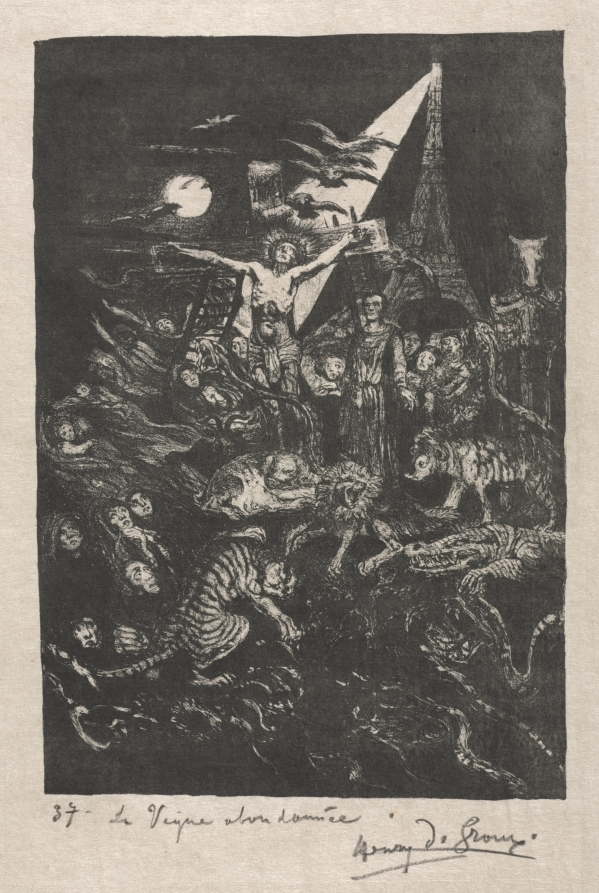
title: The Vintages!: The Abandoned Vine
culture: Belgium, 19th century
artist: Henri de Groux (Belgian, 1867–1930)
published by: Proof from an unpublished suite of lithographs intended to be published by L'Estampe Originale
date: 1894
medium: lithograph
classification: Print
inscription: lower right, in lithographic crayon: Henri De Groux; lower left, in lithographic crayon: 37 La Vigne abondonnee.